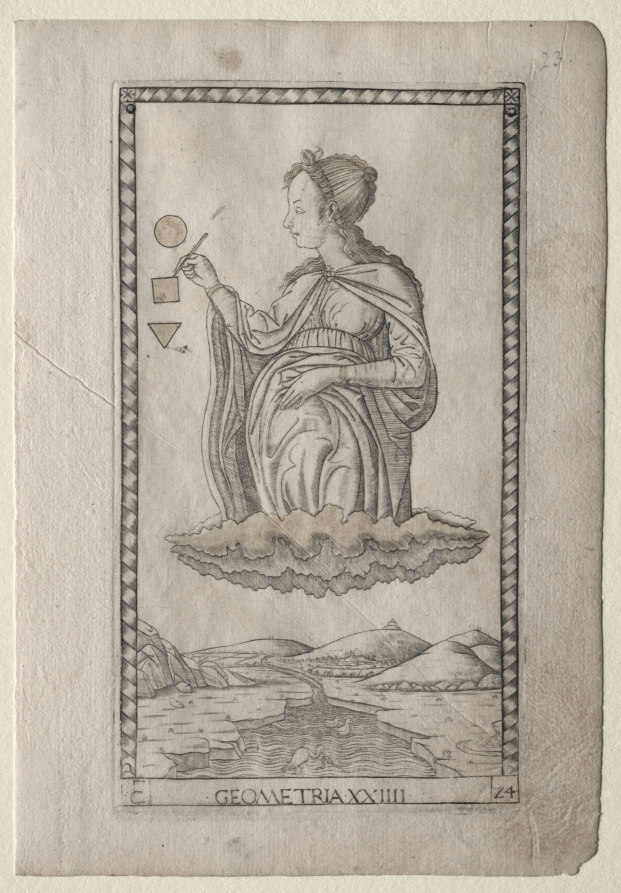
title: Geometry (from the Tarocchi, series C: Liberal Arts, #24)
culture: Italy, Ferrara, 15th century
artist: Master of the E-Series Tarocchi (Italian, active 1460s)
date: before 1467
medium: engraving, hand-colored with gold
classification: Print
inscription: Lettered below the image of Geometria (Geometry): ·C·/ ·GEOMETRIA·XXIIII· /·24·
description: This engraving is part of the group “C” named Liberal Arts. Conceptually, the liberal arts descended from classical antiquity, and were divided into the Trivium (Grammar, Rhetoric, and Dialectic or Logic) and the Quadrivium (Music, Geometry, Arithmetic, and Astronomy). In the Tarocchi set the total number was risen to ten, with the addition of the three disciplines (Poetry, Philosophy, and Theology). The liberal arts denoted knowledge or skills considered necessary to participate in a free society. By the late Middle Ages, they began to be represented in the visual arts as womanlike allegories. Here, Geometria (Geometry) is personified as a half-length pregnant female figure in profile, hovering in clouds above an imaginary landscape. She draws a square, triangle, and circle in the sky with her right hand. The identifying letter at the lower left corner of the print was originally an “E,” which was corrected by the engraver to a “C.”